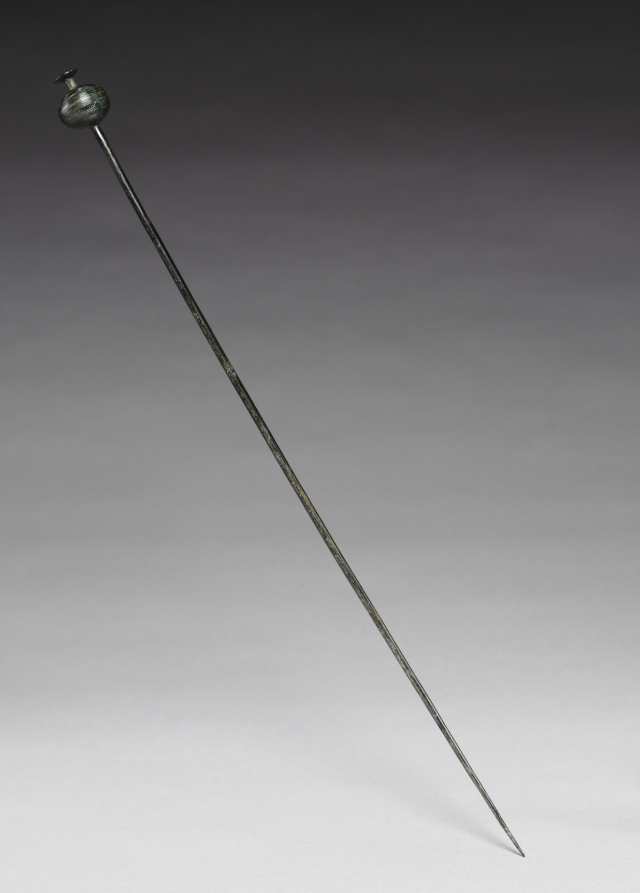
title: Garment Pin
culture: possibly Hungary, Bronze Age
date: c. 1400 BCE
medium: cast and wrought bronze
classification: Jewelry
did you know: This metal pin was used to fasten clothing.